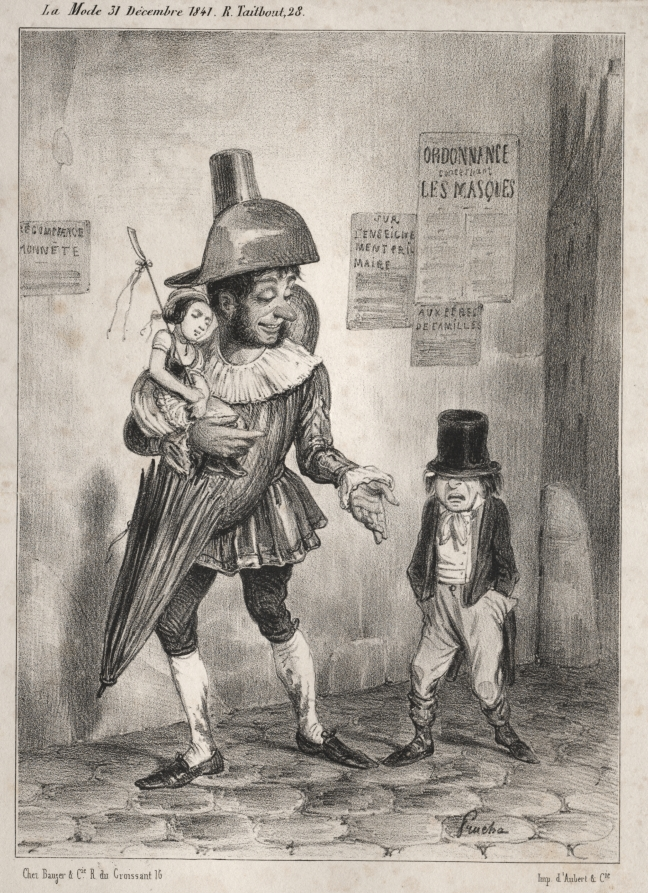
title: Pochades de carnaval: Vois-tu, si ton maître est bien content de toi et si tu as le prix de sagesse cette année! je te laisserai deguiser en paillasse! ...l'année prochaine!!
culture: France, 19th century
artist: Clémente Pruche (French, 1831–1870)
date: 1841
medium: lithograph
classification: Print